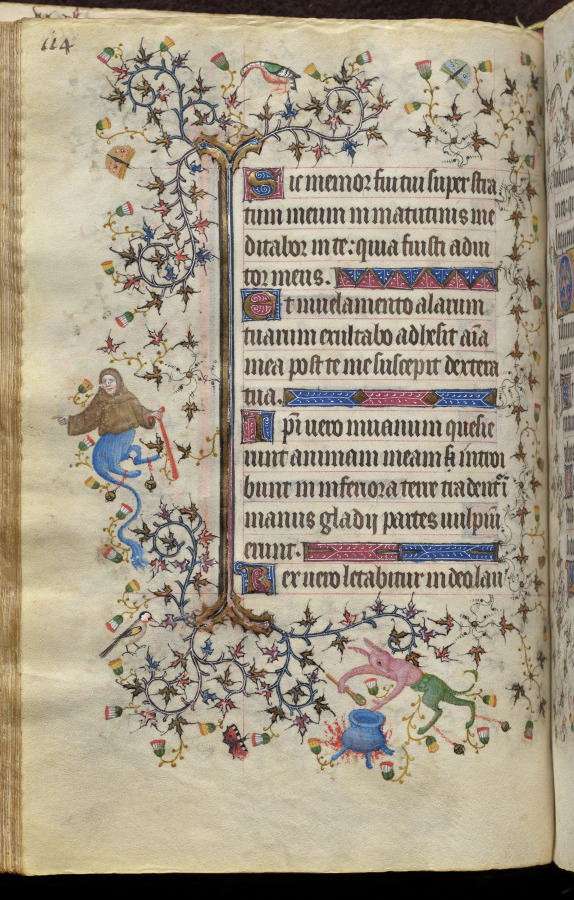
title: Hours of Charles the Noble, King of Navarre (1361-1425): fol. 57v, Text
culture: France, Paris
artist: Master of the Brussels Initials and Associates (French)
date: c. 1405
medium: ink, tempera, and gold on vellum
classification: Bound Volume